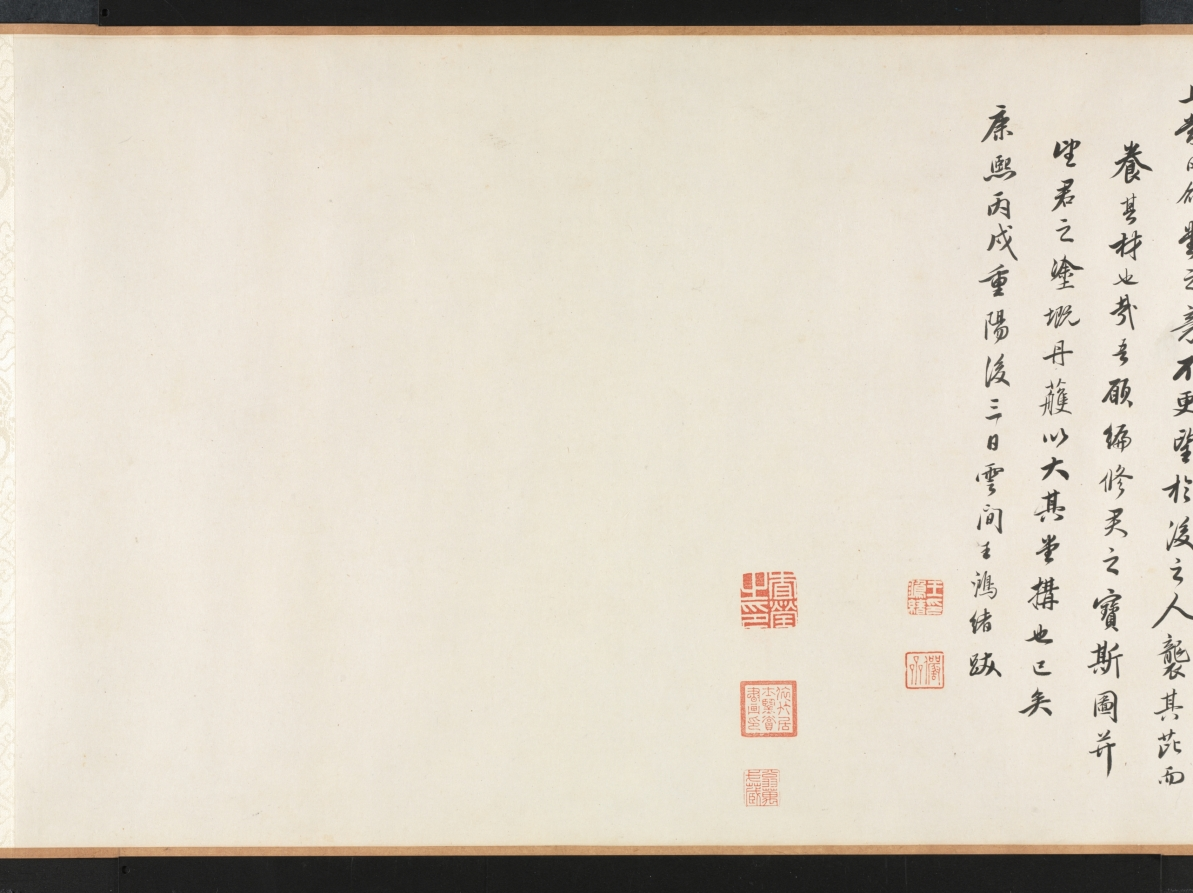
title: Hall of Lofty Pines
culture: China, Qing dynasty (1644-1911)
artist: Wang Hui (Chinese, 1632–1717)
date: 1703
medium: handscroll; ink and color on paper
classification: Painting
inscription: [題] 松喬堂圖 康熙癸未夏六月, 海虞耕煙散人王翬畫。[印]王翬之印; 石谷. [左下] 來青閣; 耕煙野老時年七十有二.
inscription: 松喬堂圖一卷，海虞石谷王君為靜海近公厲少司冦公作也。圖成于癸未之夏。未幾而公遂仙去。公令子今編修君南湖屬余題跋其後。余與公同官侍從，交契最深。側見公之清修純德，蔚為聖天子所眷重。侍直內廷，密勿贊襄，幾二十餘年。蒼生之所以受賜，士林之所以沐德者，天下莫能窺，在廷莫能悉。而公卒不言。以故宸衷日益契，恩禮亦日益渥。雖年逾懸車，時有歸老之念。而上固不聼公之去。其所謂松喬堂者，御書以賜公者也。蓋以松比公之清風勁節，而歲寒不改，經霜彌茂。則又以期公之壽考未有艾焉。公知此身未易乞，而山林槃磵之樂，止可寄諸寤思。此松喬堂圖之所由作也歟。石谷此圖，結構精密，筆墨超邁。其寫樹木之蒼蔚，堂宇之靚幽。恍見摩詰輞川樂天廬山之勝。獨惜公未得一日徜徉故園以償其願。即繪於圖亦未得以永其趣，此編修君之所以眷眷不忘也。雖然千歳之松喬，下蔭百畝，上以修棟梁之需。然則上當日名堂之意，不更望於後之人襲其芘而養其材也哉。吾願編修君之寶斯圖。并望君之塗塈丹雘，大其堂構也已矣。 康熈丙戍重陽三日，雲間王鴻緒跋。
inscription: 10 additional seals: 1 seal of Li Duna 勵杜納 (1628–1703); 4 seals of Zha Ying 查瑩 (jinshi of 1766); 5 seals of Li Yun (dates unknown).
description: Wang Hui 王翬, a leading painter in the orthodox school of the early Qing dynasty (1644–1911), was commissioned to paint this landscape with a country estate for Li Duna 勵杜納 (1628–1703), vice minister of justice in Emperor Kangxi’s court. The emperor had honored Li by granting him a piece of calligraphy with the name of Li’s retirement retreat, “Hall of Lofty Pines.” He drew a comparison between pines and Li’s upright character, resilience, and longevity. Wang Hui’s painting was supposed to allow Li to imagine living in a beautiful, secluded compound among the hills and pines. Sadly, Li died before seeing the completed painting and before receiving the emperor’s permission to retire. The landscape begins with peaceful riverbanks and low hills. The pines around the estate in the middle of the handscroll are truly lofty, some stretching even beyond the frame of the painting. Li Duna, the estate’s owner, is shown twice in his serene mountain retreat: first approaching the entrance to the compound with two servants at the right, and then later in the scroll, to the left, reading in the comfort of an inner room.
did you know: One servant carries the estate owner's carefully wrapped qin, a type of zither.